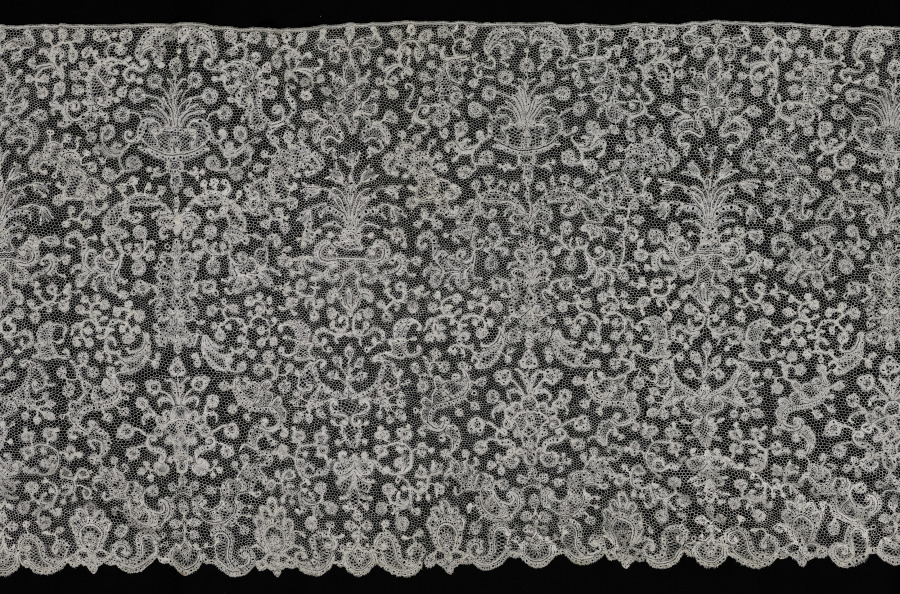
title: Bobbin Lace Flounce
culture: Flanders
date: 18th century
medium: lace, bobbin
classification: Lace